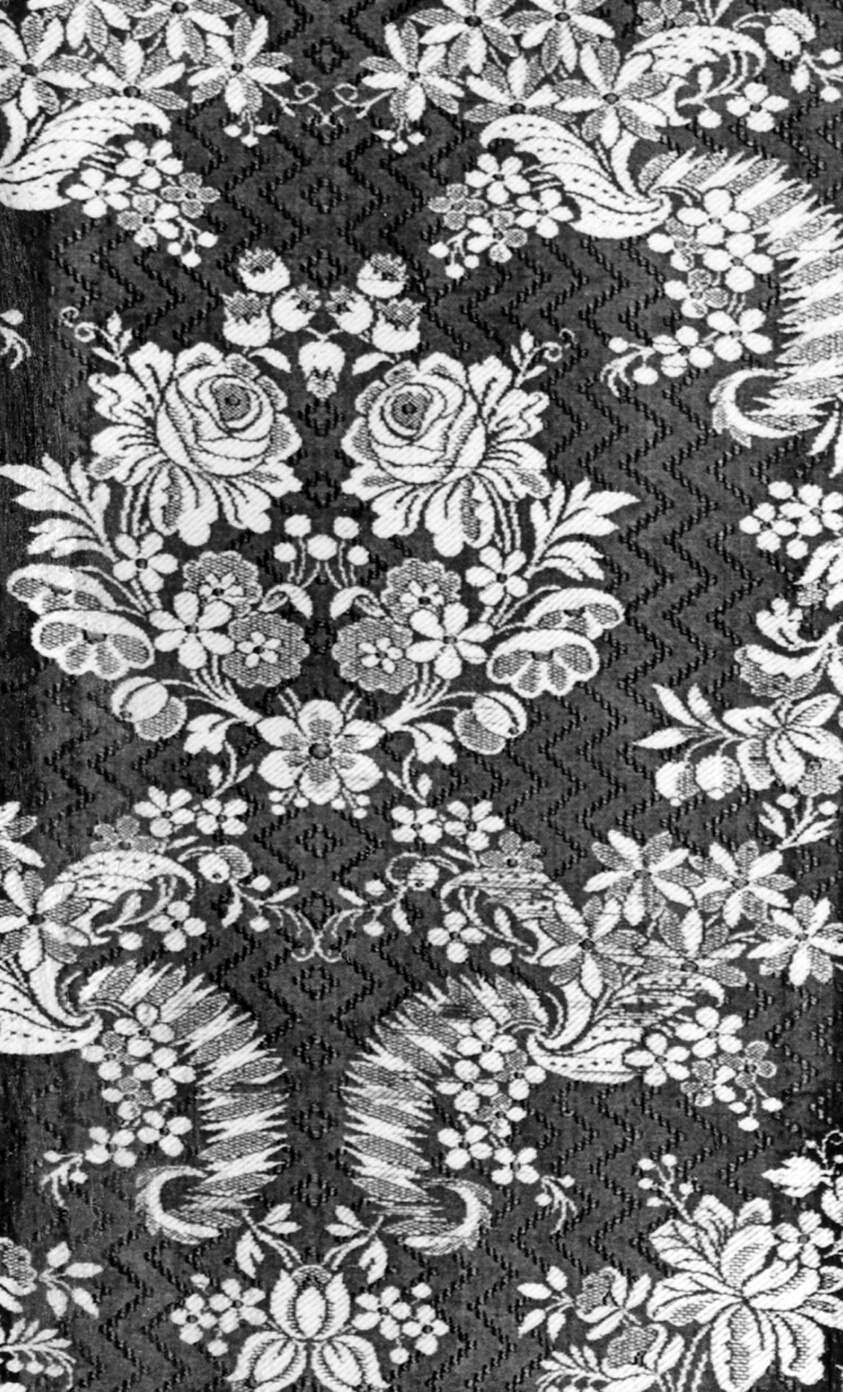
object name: Textile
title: Fragment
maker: France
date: Early 18th century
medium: silk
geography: France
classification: textile; weaving